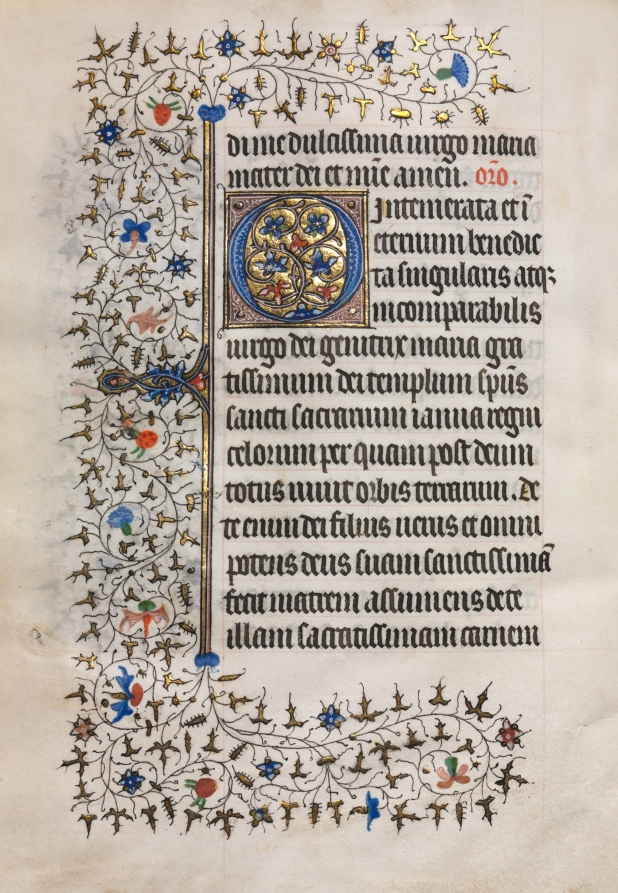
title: Book of Hours (Use of Paris): Decorated Initial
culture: France, Paris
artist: follower of Boucicaut Master (French, Paris, active about 1410–25)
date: c. 1420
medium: ink, tempera, and gold on vellum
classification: Bound Volume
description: The Guise Master-named after the book of hours he illustrated for François de Lorraine, Duke of Guise-developed his style from the more dominant Parisian workshop of the Boucicaut Master.